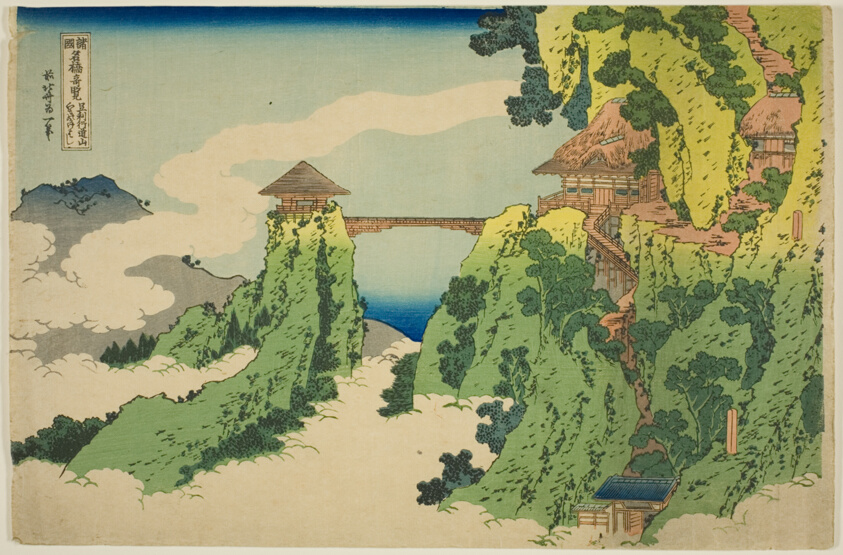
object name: Print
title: The Hanging-Cloud Bridge at Mount Gyodo near Ashikaga (Ashikaga Gyodozan kumo no kakehashi), from the series "Unusual Views of Famous Bridges in Various Provinces (Shokoku meikyo kiran)"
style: Japanese (culture or style), edo (japanese period), Japanism, East Asian, asian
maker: Katsushika Hokusai 葛飾 北斎; Japanese, 1760-1849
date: c. 1833/34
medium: Color woodblock print; oban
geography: Japan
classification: woodblock print; print; asian art